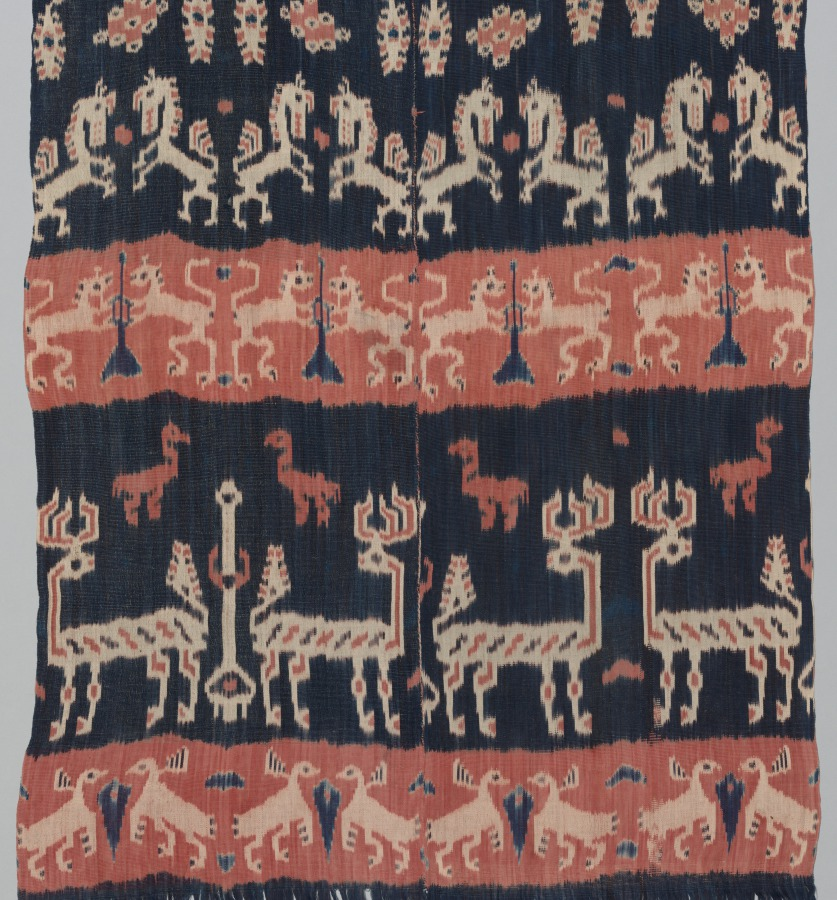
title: Hinggi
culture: Indonesia, Sumba, late 19th century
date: late 1800s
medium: cotton, ikat dyed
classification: Textile